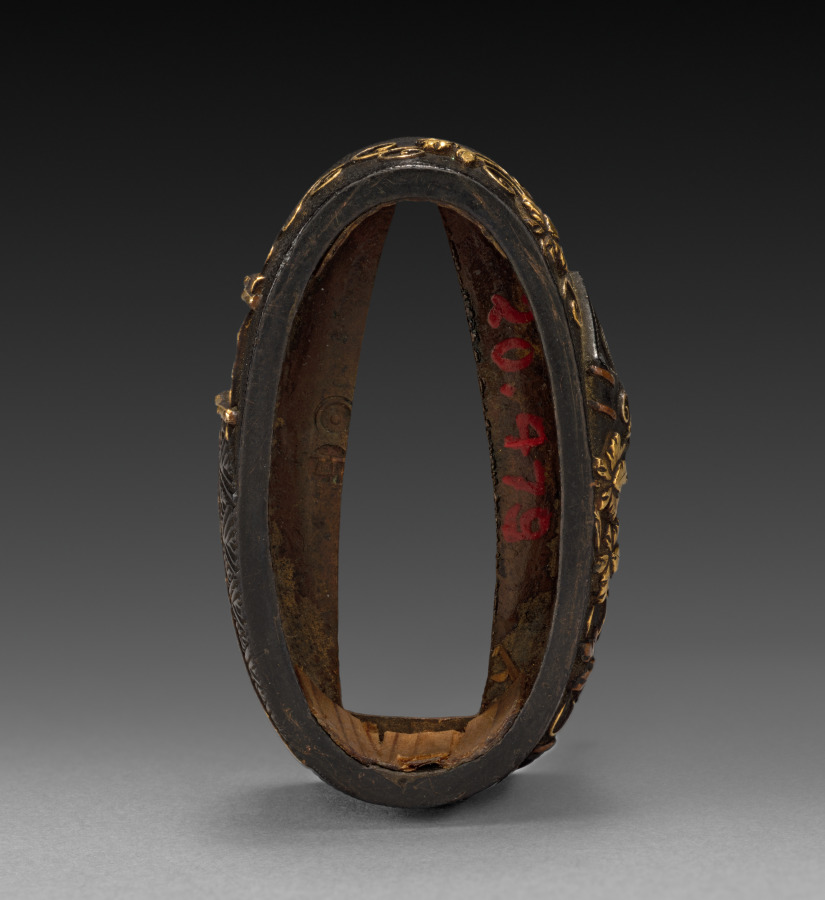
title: Sword-Hilt Collar (Fuchi)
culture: Japan, Edo period (1615–1868)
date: 1700–1850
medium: shakudo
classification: Arms and Armor